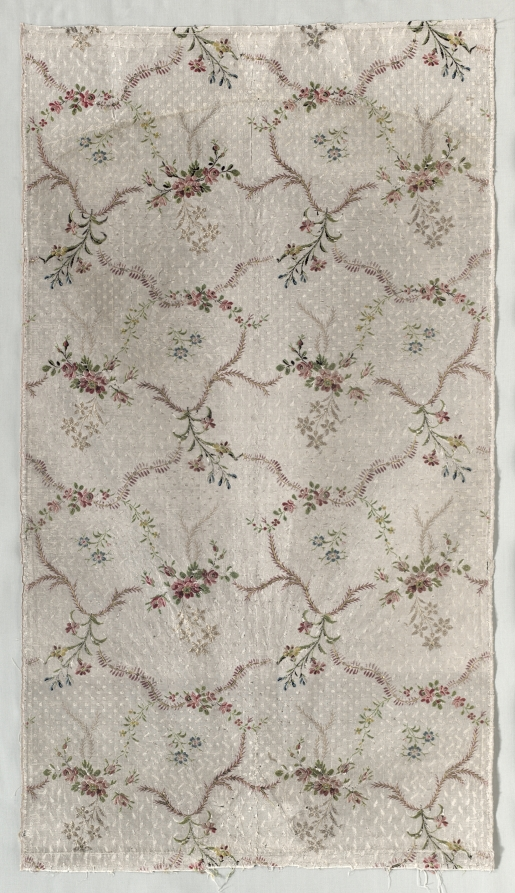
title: Length of Textile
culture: France, 18th century, Period of Louis XV (1723-1774)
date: 1723–1774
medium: plain twill, brocaded; silk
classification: Textile